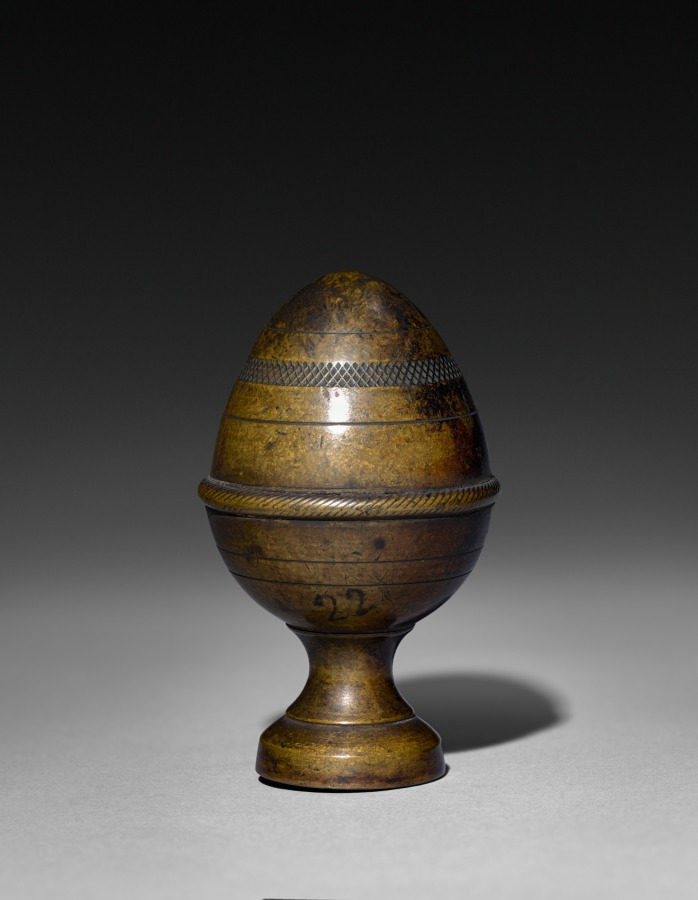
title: Ornamental Finial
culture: France, late 18th century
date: late 1700s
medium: bronze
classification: Metalwork